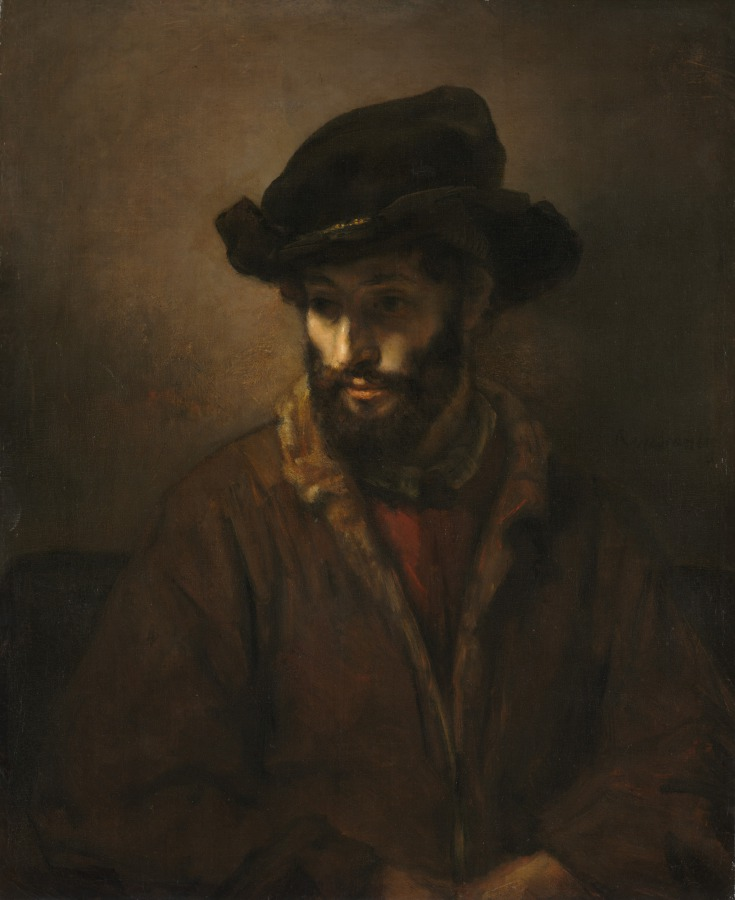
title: A Bearded Man Wearing a Hat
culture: Netherlands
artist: studio of Rembrandt van Rijn (Dutch, 1606–1669)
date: c. 1655–60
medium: oil on canvas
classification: Painting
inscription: Signed above shoulder at right: "Rembrandt 16[?]"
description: Amsterdam of the early 1600s was a religiously tolerant city, attracting many Jewish settlers of both Sephardic (Spanish and Portuguese) origin and Ashkenazic (Eastern European) descent. Rembrandt lived among both denominations and found inspiration in the manner and dress of the Ashkenazim, who maintained traditional comportment and attire and were less affluent than their Sephardim counterparts. As a result, many of the unidentified portraits from Rembrandt's late period once carried Jewish associations, but because of a lack of sufficient evidence, those assignations have since been reconsidered. Such is the case with Portrait of a Man, which was once considered a portrait of the Dutch Jewish philosopher Baruch Spinoza (1632–1677) as well as a representation of a Jewish student. Rembrandt's authorship of the painting has also undergone reassessment. The broad and thinly painted cloak and hat suggests the painting is likely a workshop product and while it does display Rembrandt's characteristic interest in a sitter's introspection, the figure's thoughtfulness remains comparatively superficial.